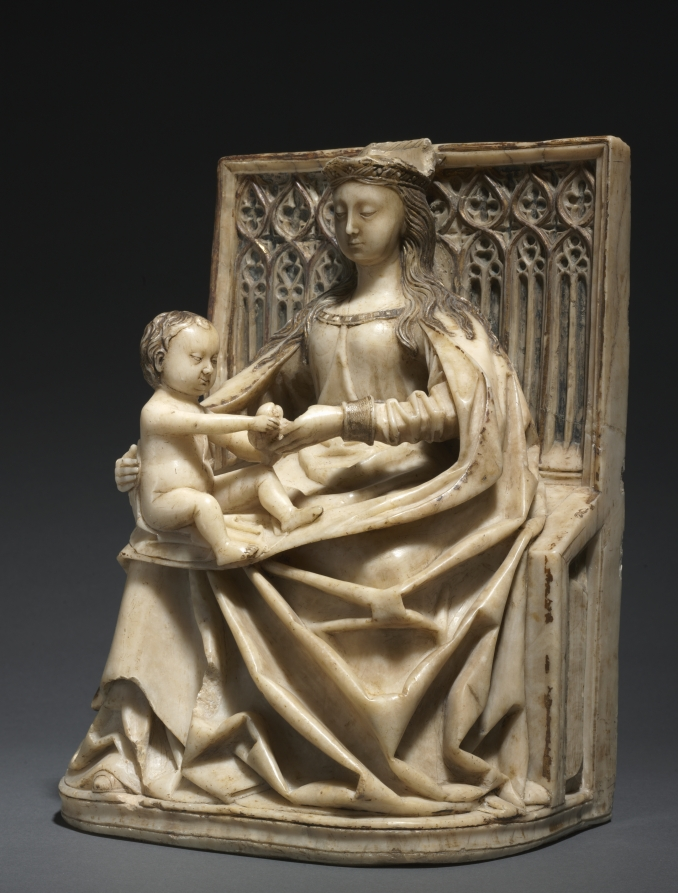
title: Enthroned Virgin and Child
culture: Spain, Burgos, 15th century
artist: Gil de Siloé (Spanish, active c. 1475–1505)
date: c. 1480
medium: alabaster with traces of gilding and polychromy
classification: Sculpture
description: The seated Virgin Mary with Christ is one of the most popular themes in Christian art of the Middle Ages. Alabaster was an ideal material to depict the fleshiness of Jesus, the lush folds of Mary’s cloak, and the fine details of the throne and gown. Christ is reaching for something in his mother’s hand that is now unrecognizable because alabaster tends to break or wear away quickly. It may have been a book or a piece of fruit. Given its small size, it is likely that this sculpture was intended for private use.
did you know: This sculpture was possibly made for Queen Isabella, the Spanish ruler who sponsored Christopher Columbus.